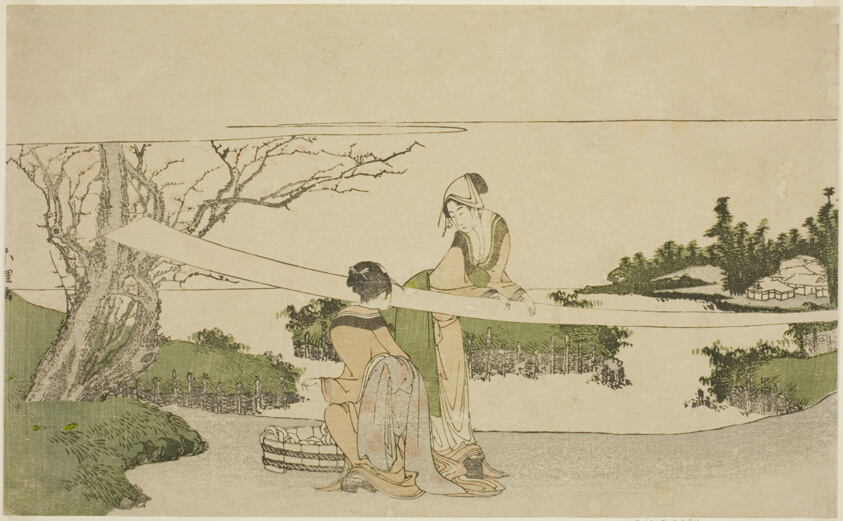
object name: Print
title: Two women stretching cloth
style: Japanese (culture or style)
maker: Katsushika Hokusai 葛飾 北斎; Japanese, 1760-1849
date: c. 1797/98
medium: Color woodblock print; double-page illustration from book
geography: Japan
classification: woodblock print; print; asian art